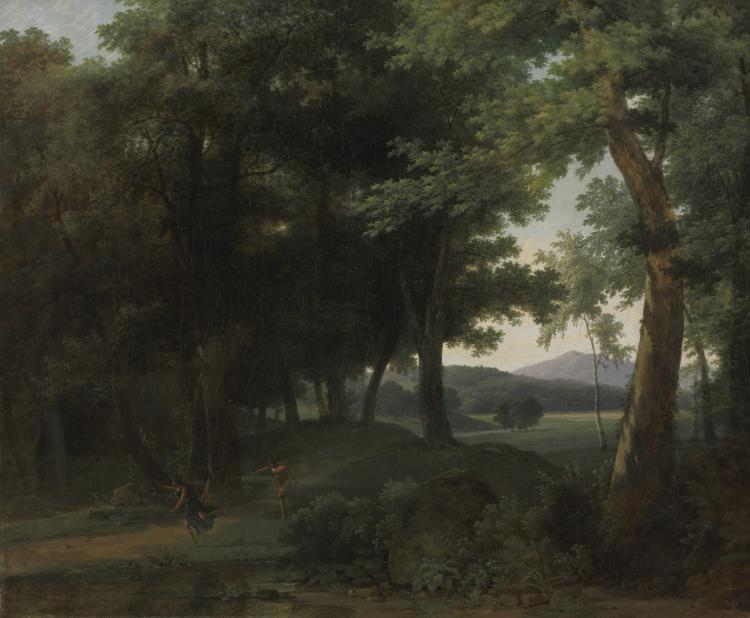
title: A Forest with Apollo and Daphne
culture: France, 19th century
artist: Jean-Victor Bertin (French, 1767–1842)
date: 1810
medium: oil on fabric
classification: Painting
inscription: Signed in brown paint lower right corner: Bertin 1810